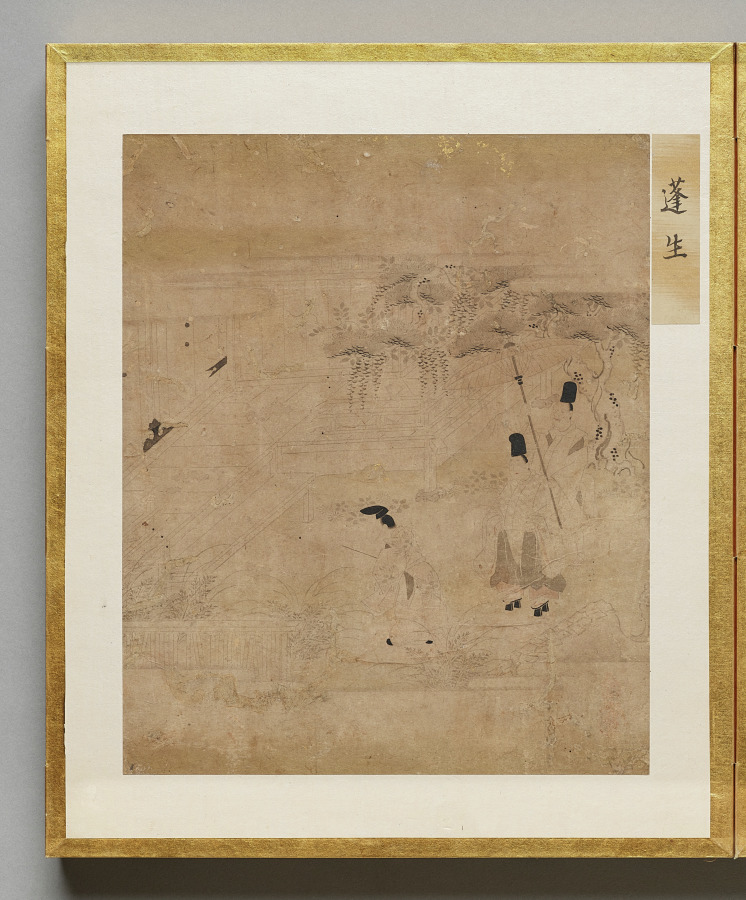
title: Wormwood Patch from Album of Illustrations for the Tale of Genji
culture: Japan, Edo period (1615–1868)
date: 1600s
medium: painting in an accordion-style album; ink, light color, and gold on paper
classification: Bound Volume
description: This album contains illustrations for the classic literary work the Tale of Genji, authored in the 1000s by Murasaki Shikibu, an aristocrat of the Heian period (794–1185) court. The scenes are painted in the “white drawing” (hakubyō) mode, in which a fine ink line is used to depict figures and spaces with great subtlety, punctuated only occasionally by traces of red pigment for a character’s lips, a detail of a garment, or a decorative element. These two scenes illustrate episodes from the chapters “Thin Veil of Cloud” (Usugumo) and “Barrier Gate” (Sekiya).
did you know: The illustrations are identified by chapter title in cartouches to the upper right of the paintings.